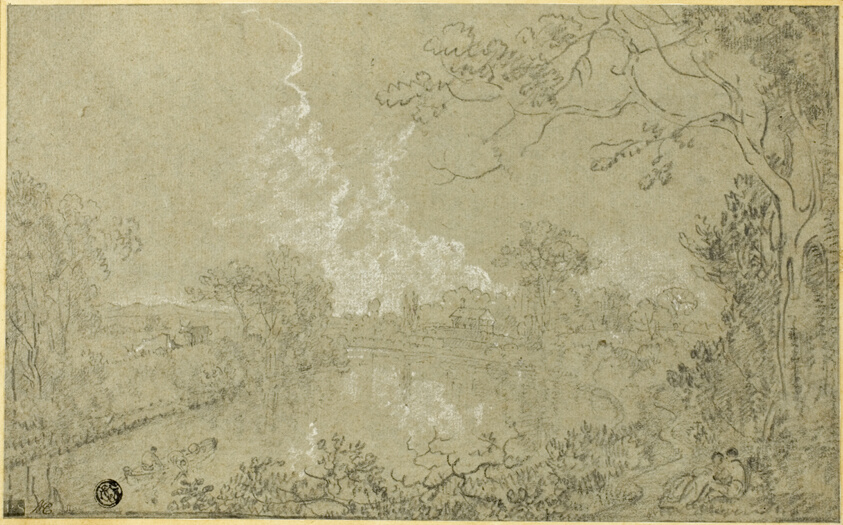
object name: Drawing and Watercolor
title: Banks of the River Dee near Eaton Hall, Cheshire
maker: Richard Wilson (English, 1714-1782)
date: c. 1759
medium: Black and white chalk on blue laid paper, laid down on card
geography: England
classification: chalk; drawings (visual works); prints and drawing